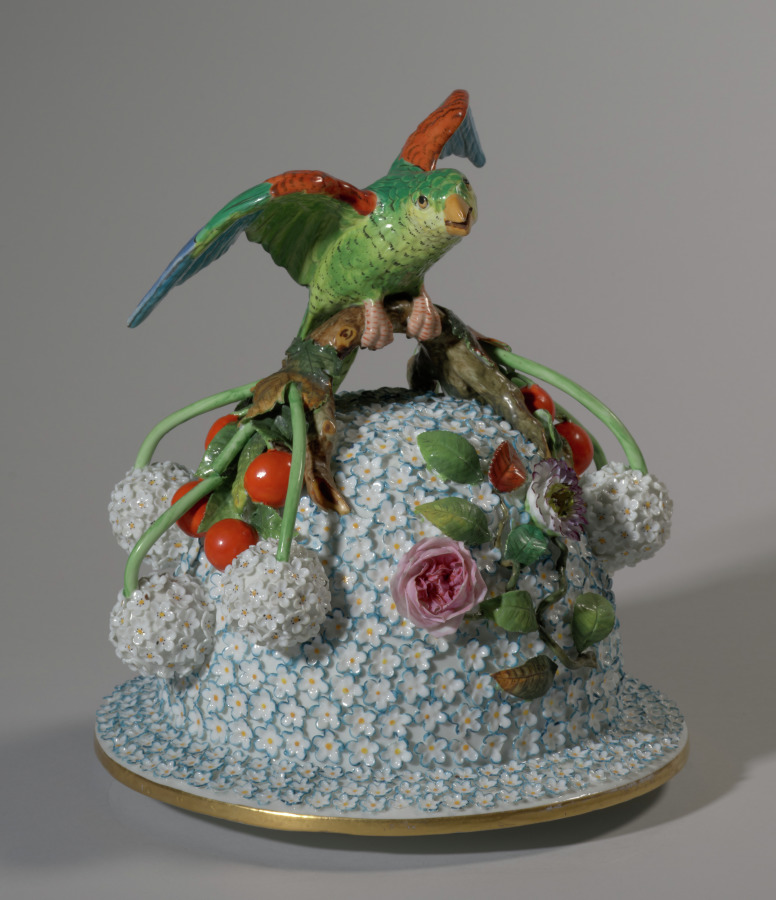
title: Vase (lid)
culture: Germany, 19th century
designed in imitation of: Meissen Porcelain Factory (German, est. c. 1710)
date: 1850–1899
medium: porcelain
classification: Ceramic